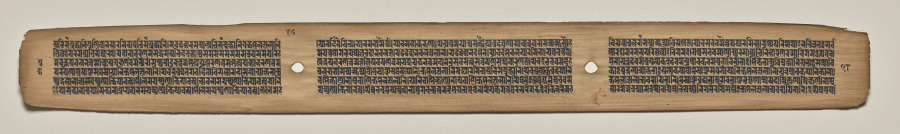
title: Text, Folio 48 (verso), from a Manuscript of the Perfection of Wisdom in Eight Thousand Lines (Ashtasahasrika Prajnaparamita-sutra)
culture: Eastern India, Bihar, Vikramashila Monastery. Painting: Nepal, Kathmandu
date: Sunday, September 14, 1119 (year 239 of the Newar Samvat in the month of Ashvina)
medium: gum tempera and ink on palm leaves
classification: Painting